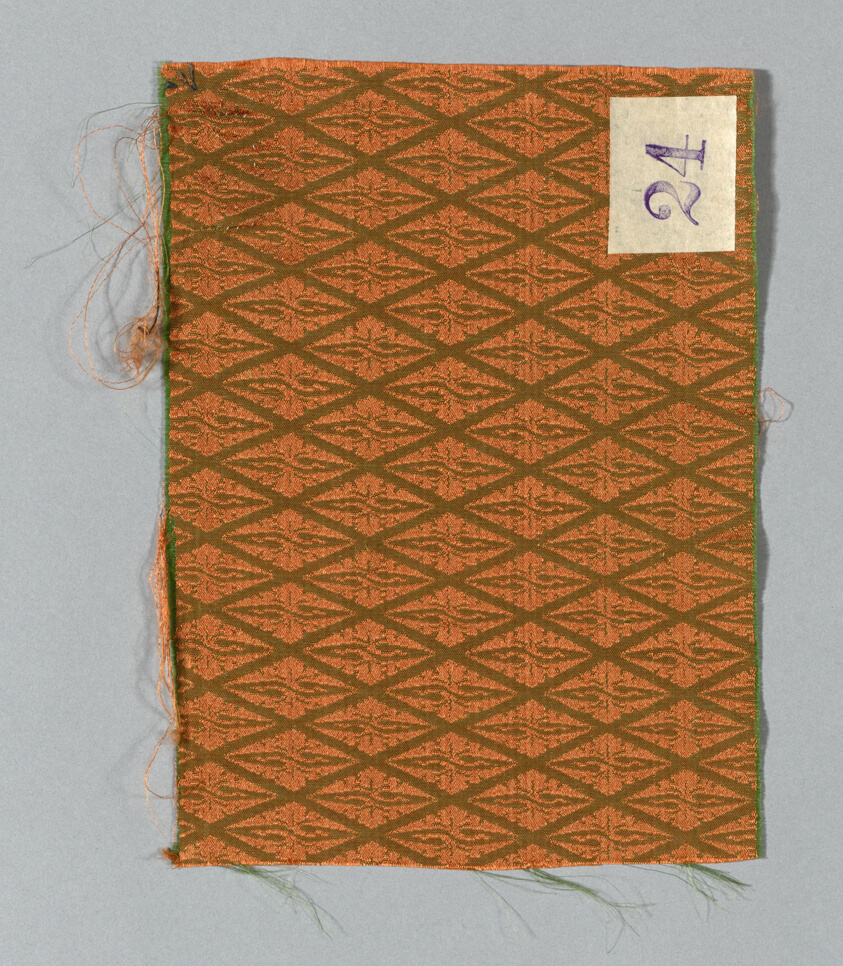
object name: Textile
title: Fragment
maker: Japan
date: Edo period (1615–1868), 1700/25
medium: Damask; silk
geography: Japan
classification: textile; weaving